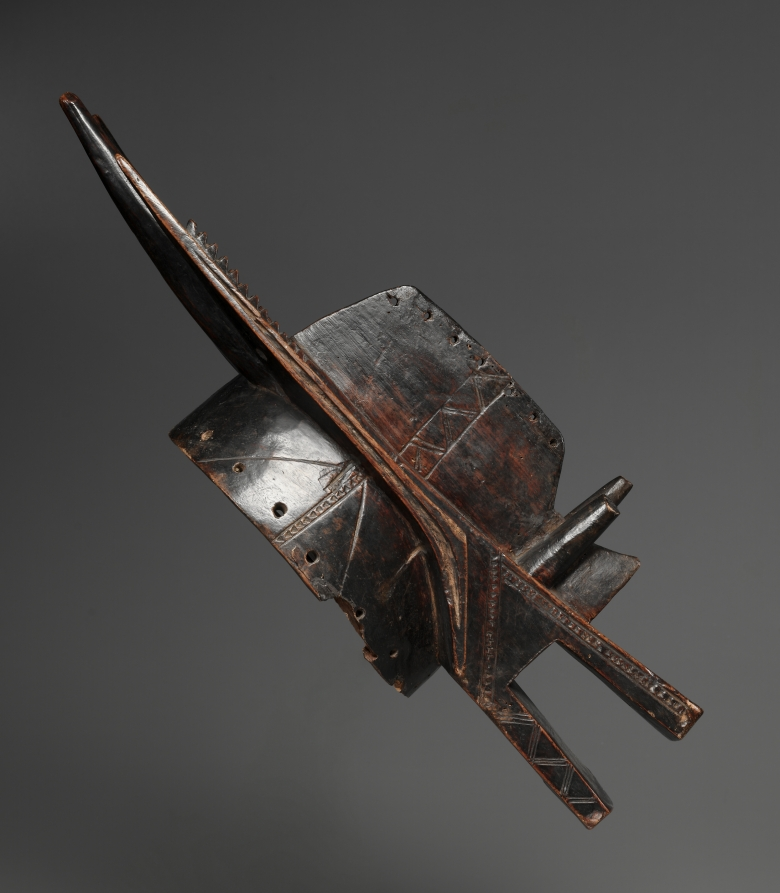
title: Helmet Mask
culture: Africa, West Africa, Mali, Malinke-style blacksmith-carver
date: mid- to late 1800s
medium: Wood and probably resin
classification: Mask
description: Combining animal and human traits, this example of a genre of mask called suruku, meaning “hyena,” most likely belonged to the Korè, one of six power associations that the Malinke would have adopted from their Bamana neighbors. The Korè is concerned with the circumcision and initiation of male youths into adulthood. The mask probably served as one of the symbols of the different Korè classes.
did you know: Holes along the top ridge of this mask once held a crest made of cane, red fibers, and cowrie shells.